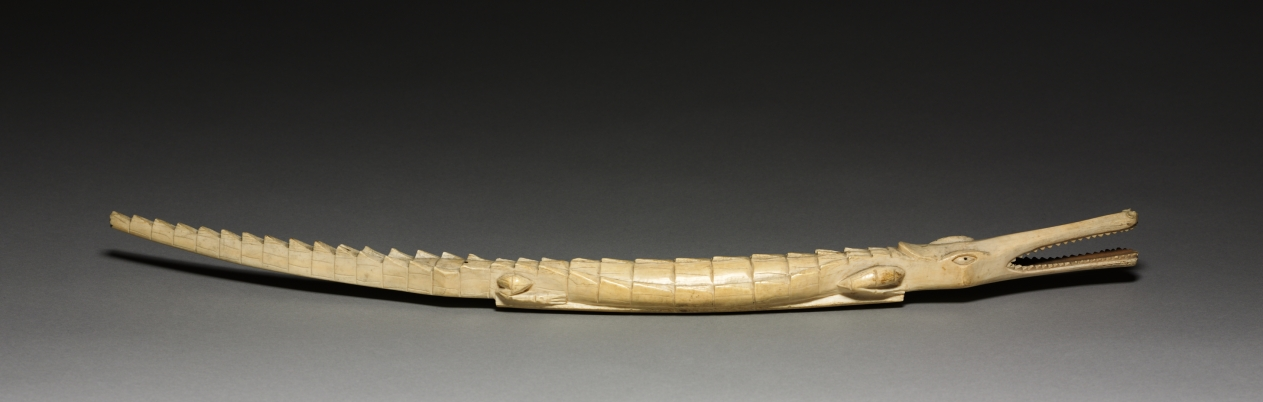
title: Alligator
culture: Africa, Central Africa, Democratic Republic of Congo, unknown maker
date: 1900s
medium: Elephant ivory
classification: Sculpture